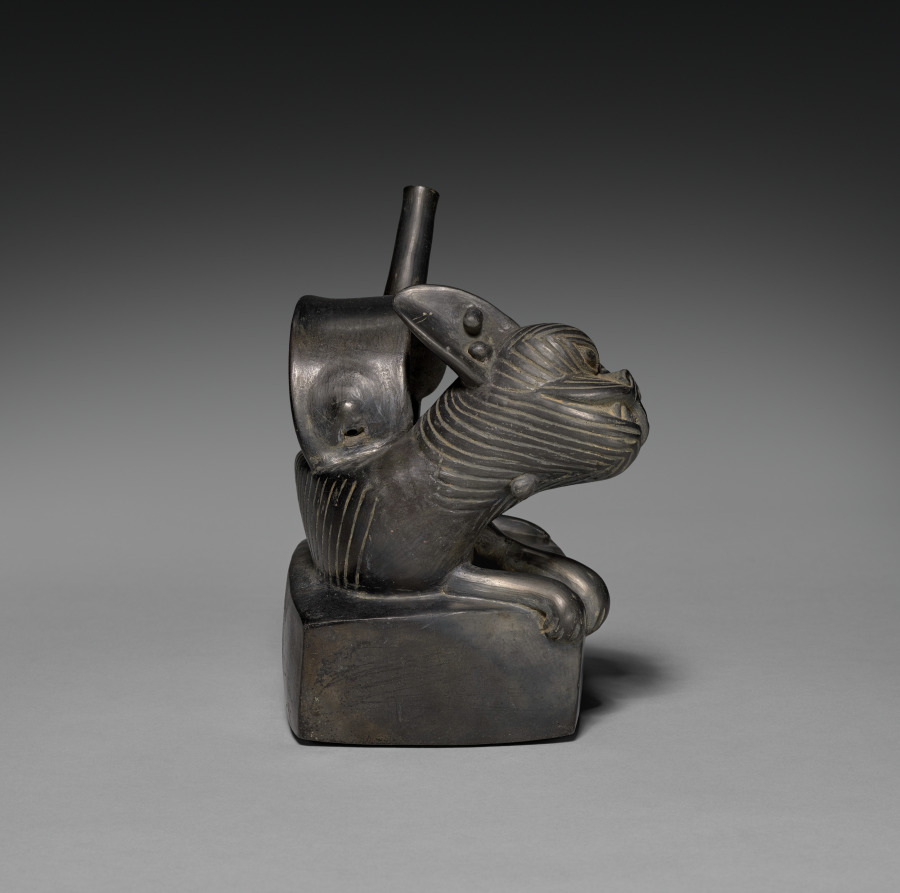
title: Vessel with Reclining Dog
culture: Central Andes, North Coast, Chimú-Inka style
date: 1470–1532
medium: ceramic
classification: Ceramic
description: This vessel represents a Peruvian hairless dog who has recently given birth and seems to be taking a break from maternal obligations. The meanings of such dogs may be connected to the trade networks that brought them to Peru from Mexico in the late pre-Hispanic period. Perhaps these foreign ties made them prestige animals whose breeding engendered further status for the owner.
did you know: This vessel represents a Peruvian hairless dog who has recently given birth.